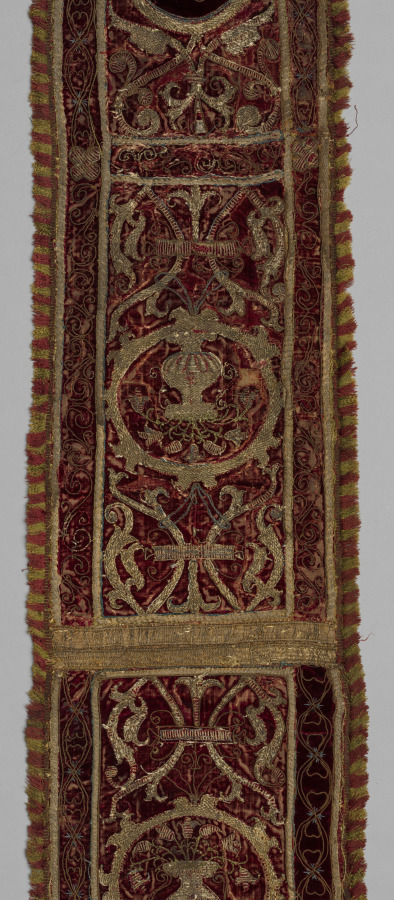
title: Embroidered Strip of Velvet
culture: Spain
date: 1500s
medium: embroidery: silk and gold thread on velvet, fringe border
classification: Velvet